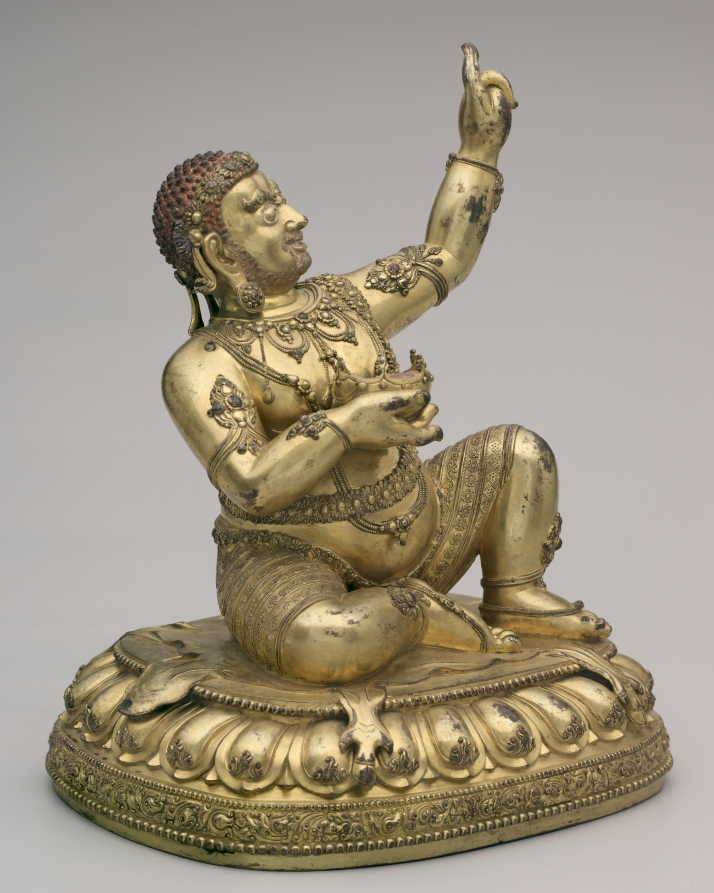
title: Virupa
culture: China, Ming dynasty (1368-1644), Yongle reign (1403-1424)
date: early 1400s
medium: Gilt bronze with silver, stones, and pigment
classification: Sculpture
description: Virupa is one of the great teachers in the history of tantric Buddhism. His posture references his ability to stop the sun; as an enlightened being, he can control phenomena of nature. As a tantric practitioner, he overturns ordinary assumptions about proper behavior, so he overeats, drinks large quantities of liquor, and waits for the king to pay his bill at the tavern. At the edge of the lotus pedestal is an inscription identifying the image as having been made in the imperial kilns of the third emperor of the Ming dynasty in China as a gift to a Tibetan monastic leader. While closely linked to Tibetan styles, the luxurious detailing, special gilding process, and the casting of the ornaments onto the body without use of inlay are specifically Chinese characteristics.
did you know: Virupa's clothing and jewelry are embellished with silver and stones, while pigments enhance his hair and eyes.